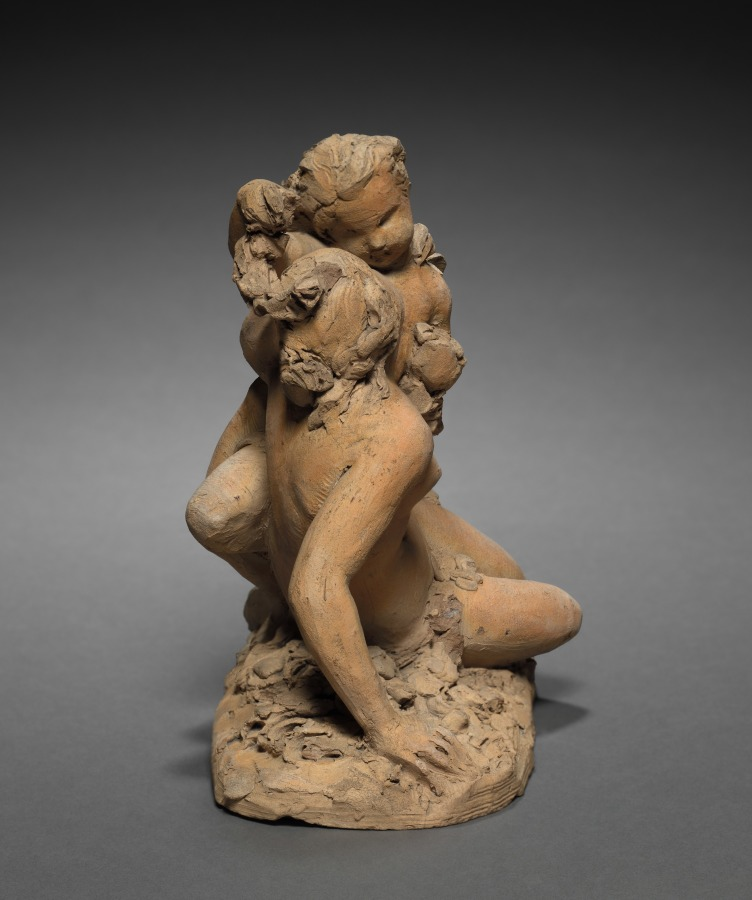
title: Venus and Cupid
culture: France, 19th century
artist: Jean-Jacques Feuchère (French, 1807–1852)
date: c. 1840–1850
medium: terracotta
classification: Sculpture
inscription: in ligature incised into base at front right corner: "Feuchere"; below are some marks that might be a date, but are illegible.